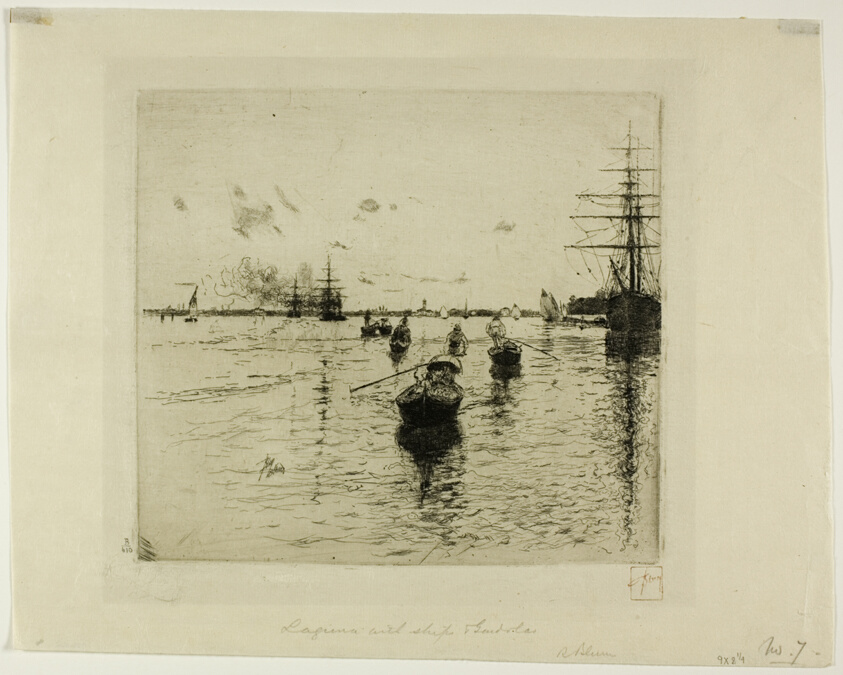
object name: Print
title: Lagune with Steamers and Gondolas, Venice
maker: Robert Frederick Blum (American, 1857-1903)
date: 1885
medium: Etching on ivory laid paper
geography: United States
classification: etching; print; prints and drawing